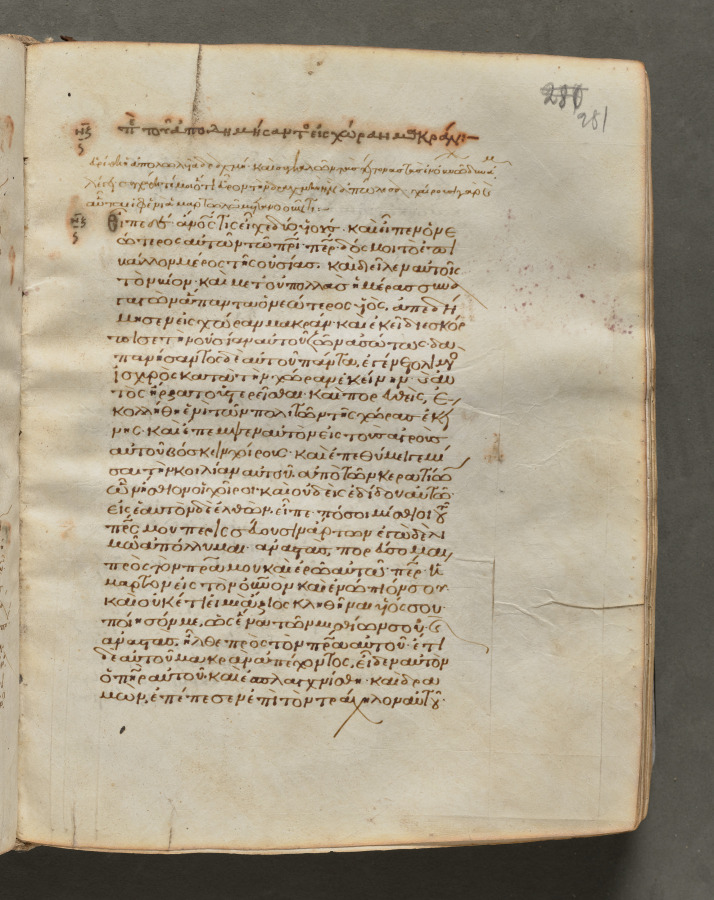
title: Text, folio 281 (recto), from a Gospel Book with Commentaries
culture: Byzantium, Constantinople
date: c. 1000–1100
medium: ink, tempera, and gold on vellum; leather binding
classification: Bound Volume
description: Each of the four gospels in this book opens on a page with brilliantly illuminated borders depicting the author of the text as well as birds—principally peacocks, symbols of the immortality of the soul—and fountains, representing the fountain of life and the salvation of the soul. This volume consists of 428 leaves with texts in Greek. Its level of sophistication suggests that it was probably written and decorated in a monastery in Constantinople.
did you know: Gospel books were carried in procession through Byzantine churches.